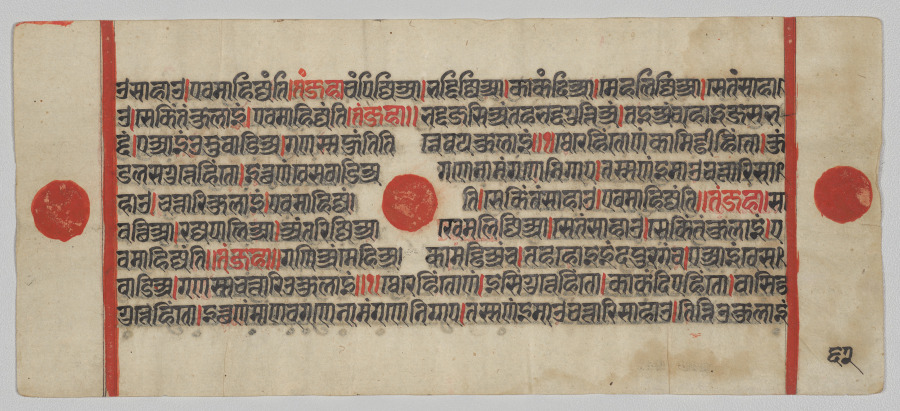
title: Text, Folio 62 (verso), from a Kalpa-sutra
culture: Western India, Gujarat, last quarter of the 15th century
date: c. 1475–1500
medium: Gum tempera, ink, and gold on paper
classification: Painting